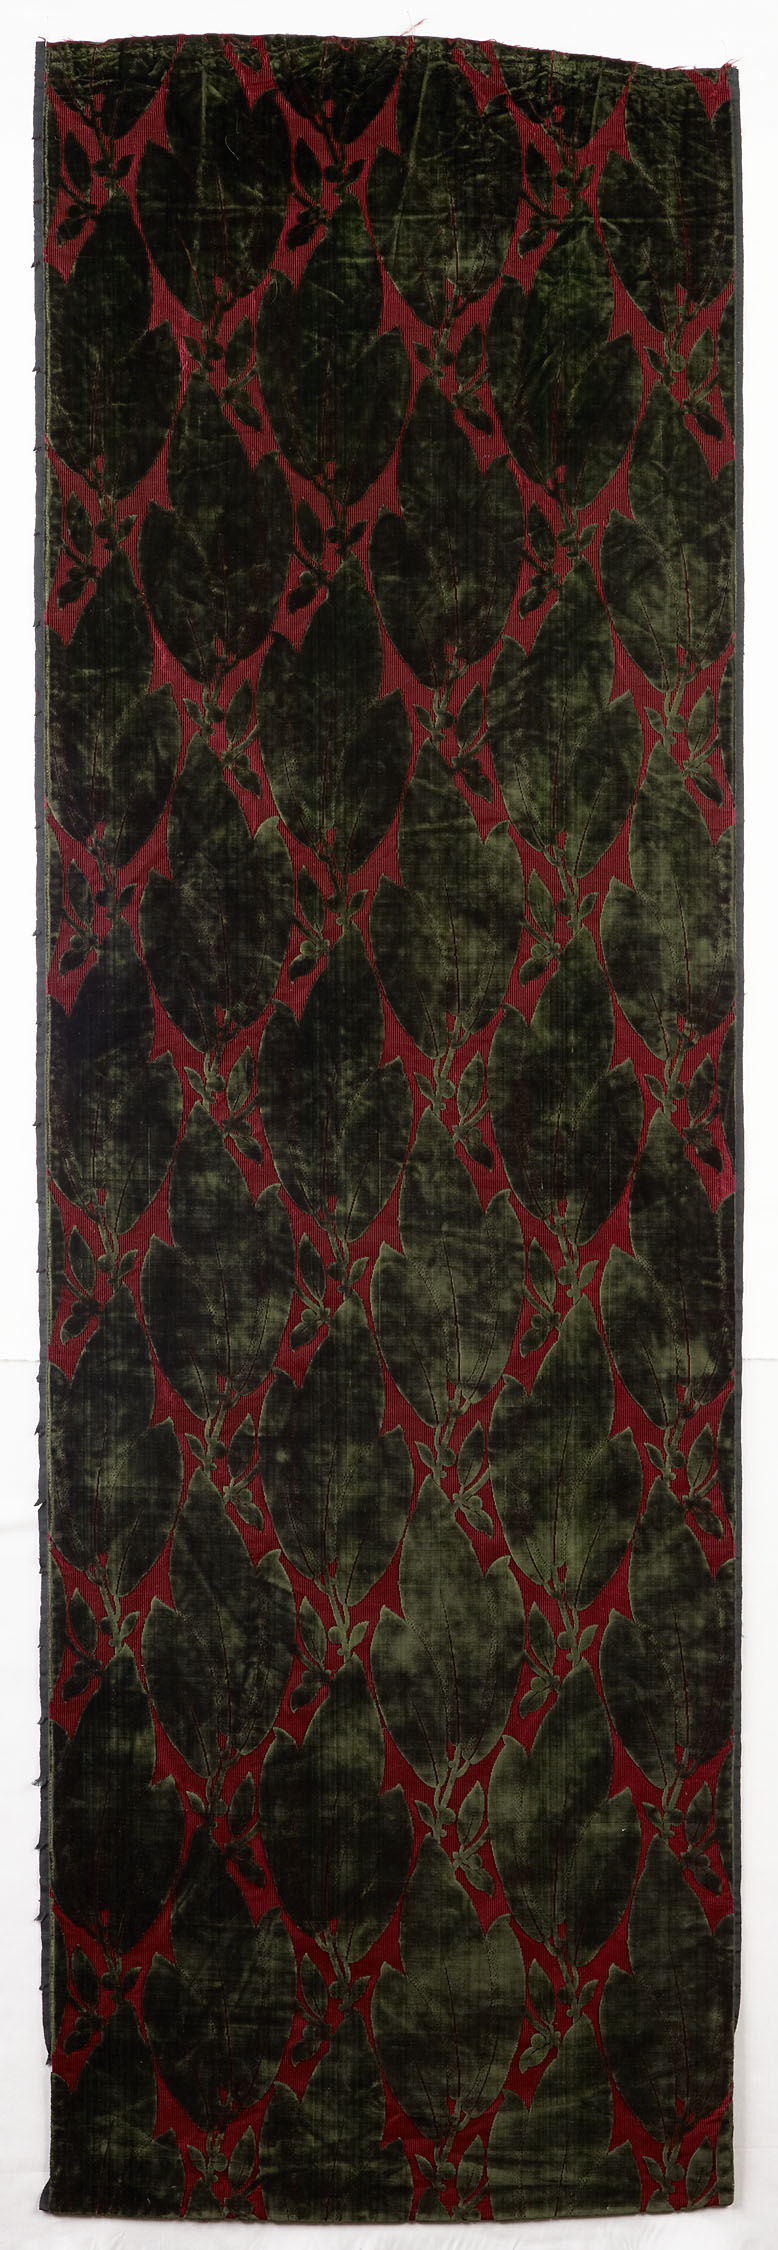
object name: Textile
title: Panel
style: Art Nouveau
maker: France, Lyon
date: c. 1890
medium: Silk, plain weave with supplementary patterning wefts and pile warps forming cut voided velvet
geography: Lyon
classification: textile; weaving - velvet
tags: foliage